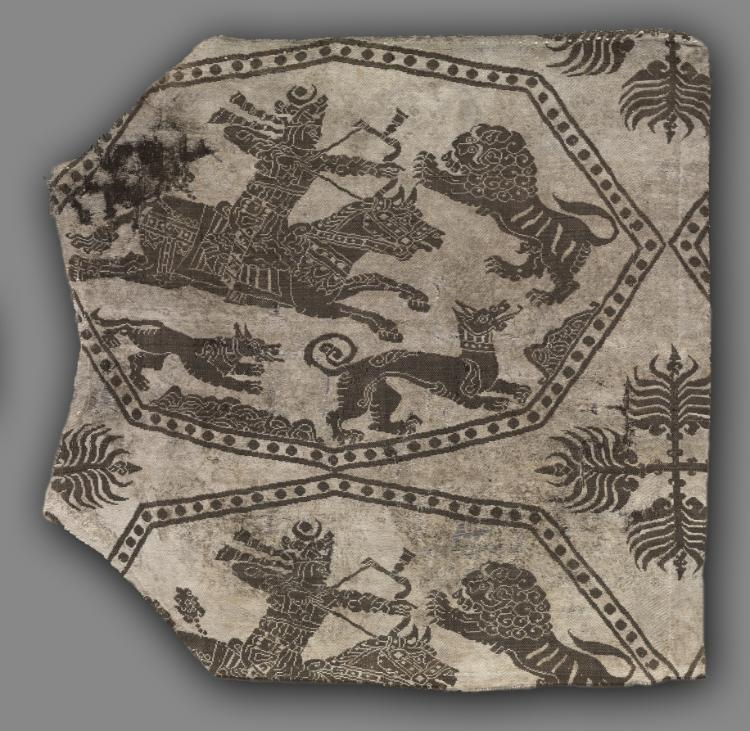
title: Fragment of a Caftan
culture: Iraq or Iran, in the style of the Buyid period (945–1055)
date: before 1982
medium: lampas weave, silk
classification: Textile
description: This fragment from a caftan features large-scale flattened octagons with pearled borders that contain a royal hunting scene: a king mounted on a running horse draws his bow at a rampant lion. Two dogs with their tongues out also run towards the lion. The star-shaped interspaces are filled with four radiating palmettes.